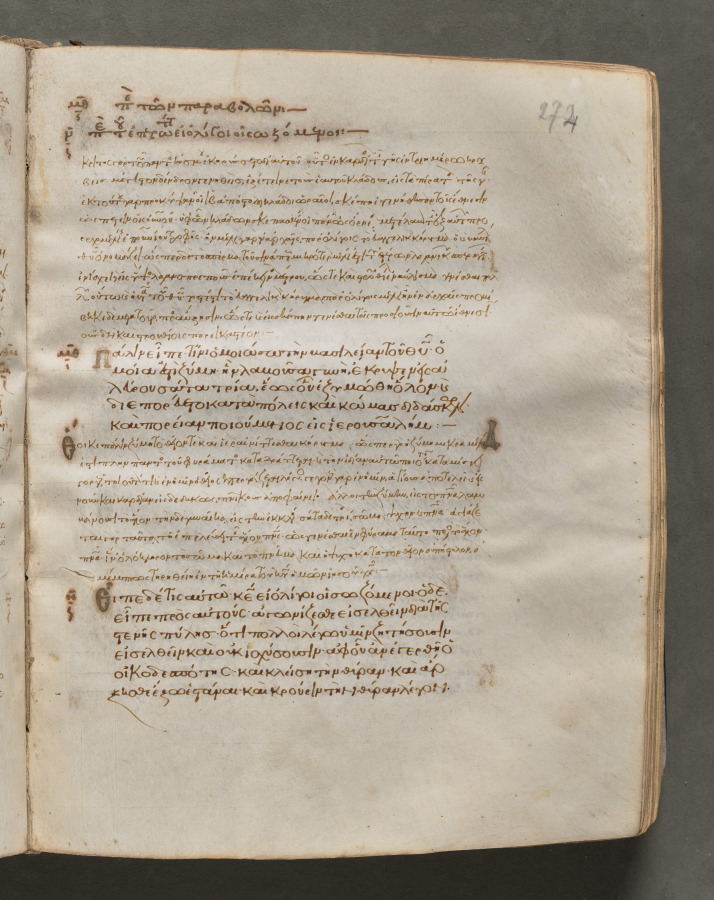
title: Text, folio 274 (recto), from a Gospel Book with Commentaries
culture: Byzantium, Constantinople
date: c. 1000–1100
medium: ink, tempera, and gold on vellum; leather binding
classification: Bound Volume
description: Each of the four gospels in this book opens on a page with brilliantly illuminated borders depicting the author of the text as well as birds—principally peacocks, symbols of the immortality of the soul—and fountains, representing the fountain of life and the salvation of the soul. This volume consists of 428 leaves with texts in Greek. Its level of sophistication suggests that it was probably written and decorated in a monastery in Constantinople.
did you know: Gospel books were carried in procession through Byzantine churches.